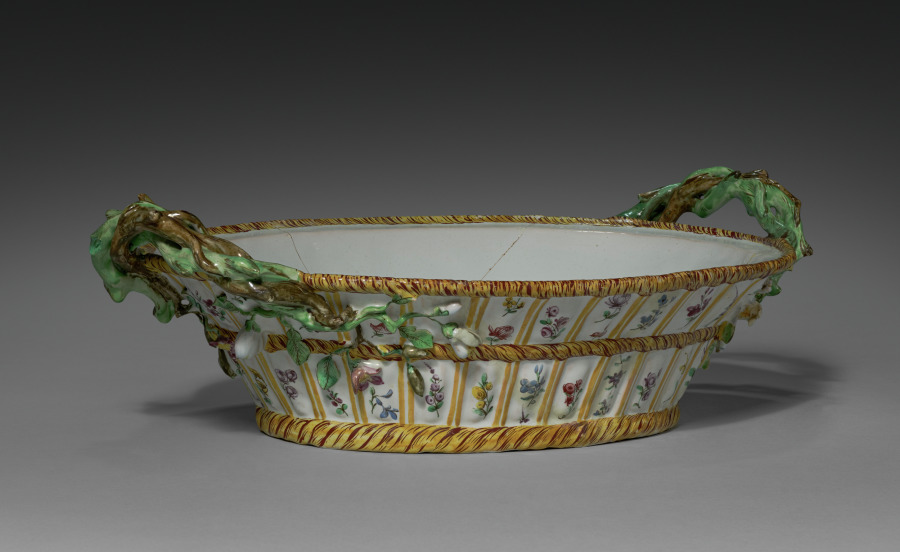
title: Tureen in the Form of a Basket of Game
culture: France, 18th century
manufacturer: Sceaux Factory (French, active 1748–66)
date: c. 1755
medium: Tin- glazed earthenware (faience) wth enamel decoration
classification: Ceramic